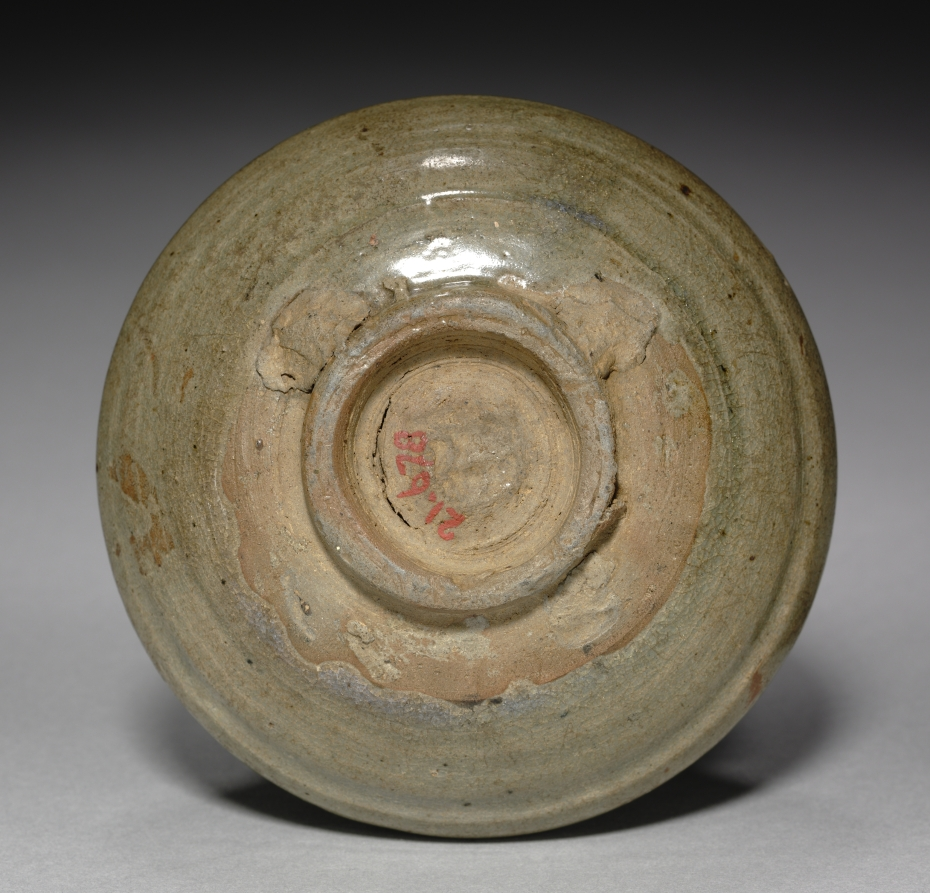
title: Jar with Stamped Decoration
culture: Korea, Joseon dynasty (1392–1910)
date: 1400s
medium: stoneware with incised design, white slip, and overglaze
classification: Ceramic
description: This small jar may have been used as a container for powdered tea among Japanese tea drinkers. Possibly produced in one of the kilns established by the trading office (Waegwan) in Busan, southern Gyeongsang province, it was sold to Japanese tea bowl collectors. According to a historical record dated to 1641, one trading boat shipped more than 14,000 tea bowls to Japan.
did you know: This little jar was part of the gift donated by John L. Severance (1863–1936). He and his father Louis H. Severance (1838–1913) collected Korean ceramics of the Goryeo dynasty (918–1392) from a number of pioneering medical missionaries as a way to foster their activities in Korea, and later donated them to the Cleveland Museum of Art.